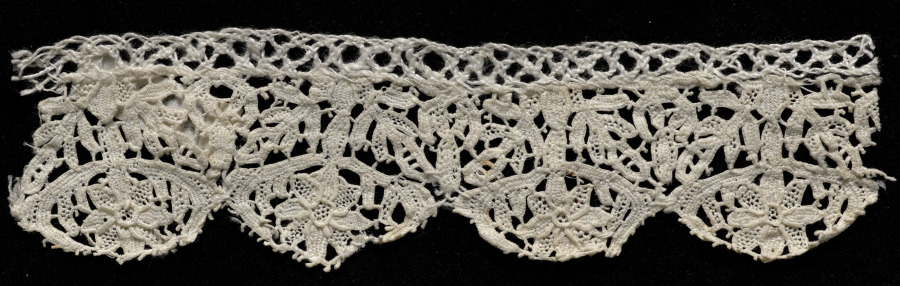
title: Lace Fragment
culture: Spain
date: 1600s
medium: Needle lace (Punto in aria) edging and bobbin lace insertion (modern)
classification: Lace